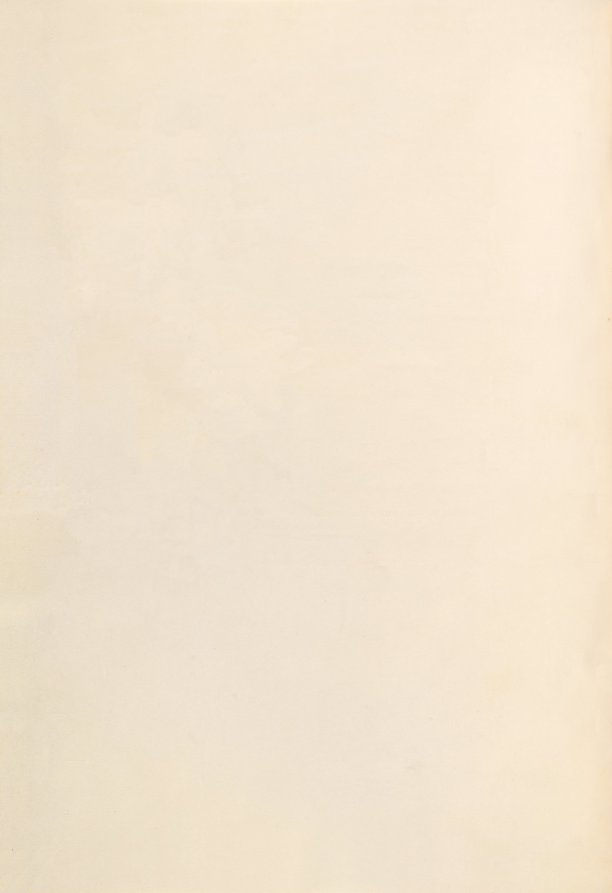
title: Hours of Queen Isabella the Catholic, Queen of Spain: Fol. 280v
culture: Flanders, Ghent and Bruges, late 15th century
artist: Master of the First Prayerbook of Maximillian (Flemish, c. 1444–1519)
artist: and Associates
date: c. 1500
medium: ink, tempera, and gold on vellum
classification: Bound Volume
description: This manuscript was illuminated by a circle of at least five highly organized manuscript painters active in the Flemish cities of Ghent and Bruges. The principal illuminator was Alexander Bening, who painted the majority of the book's miniatures. Manuscripts produced by this circle of artists are renowned for the decoration of their borders, which typically feature a rich variety of realistically-painted flowers, birds, and butterflies. This prayer book, called a book of hours, was intended not for a cleric, but for the private devotions of a lay person-in this case, Isabella the Catholic, Queen of Spain (1451-1504). Isabella's coat of arms embellishes the book's frontispiece. It is unlikely that the book was commissioned by the Queen herself; rather, she probably received it as a diplomatic gift from someone courting her patronage, perhaps Cardinal Francisco Jimenez de Cisneros. A Franciscan friar, Jimenez was dependent upon Isabella for his advancement, first to the post of Queen's confessor in 1492, and then to Archbishop of Toledo in 1495.